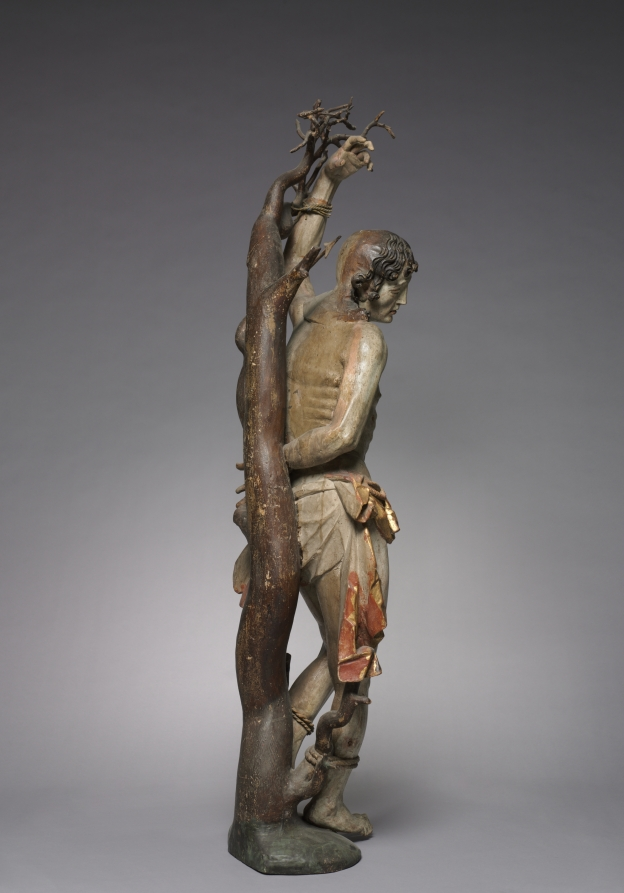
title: Saint Sebastian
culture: Germany, early 17th century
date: c. 1600–1620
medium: painted and gilded wood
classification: Sculpture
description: An early Christian saint and martyr, Sebastian was condemned to death by the Roman emperor Diocletian. Bound to a tree and shot with arrows, he survived—only later to be martyred by beating. This figure embodies the blend of stylistic influences that characterized German sculpture in the early 1600s. The graceful pose and anatomical naturalism of the legs indicate the influence of Italian Mannerism, while the crisp, stylized patterns of Sebastian’s hair and loincloth recall German Gothic works from the 1400s. The tree to which Sebastian is bound is an actual branch, shaped and refined to its present appearance.